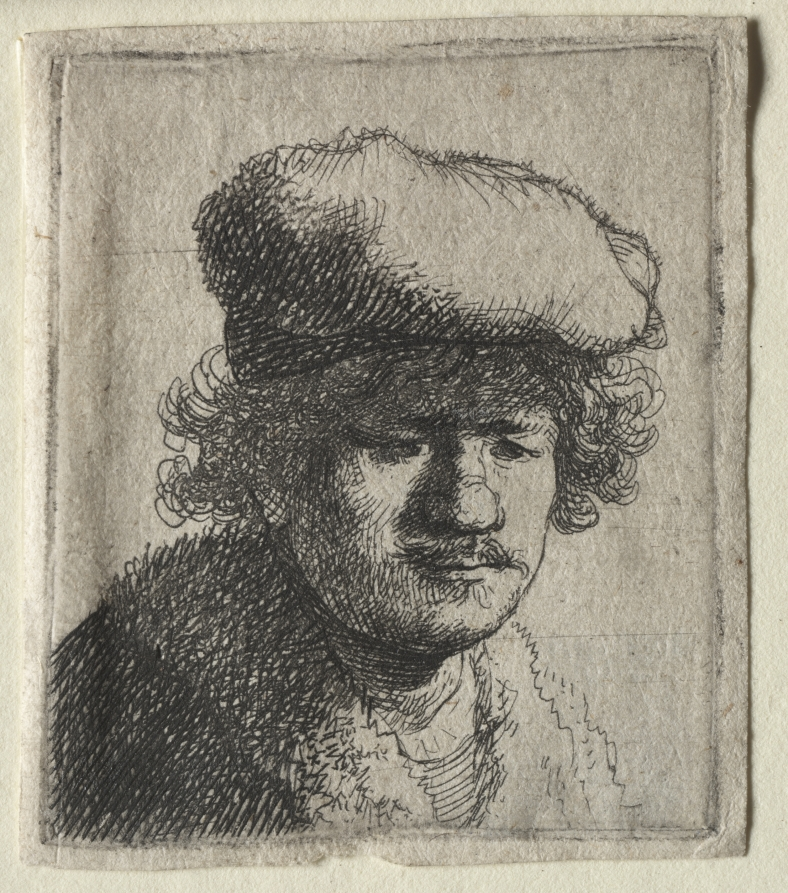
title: Self-Portrait with Cap Pulled Forward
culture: Netherlands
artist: Rembrandt van Rijn (Dutch, 1606–1669)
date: c. 1631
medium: etching with engraving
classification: Print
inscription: VERSO, center, in graphite: B. 319 ; lower left, in graphite: A78499 ; lower left, in graphite: s/[d1?] ; lower right, in graphite: 1[circled] ; lower right, in graphite: 70 ; lower right, in graphite: [#1?]